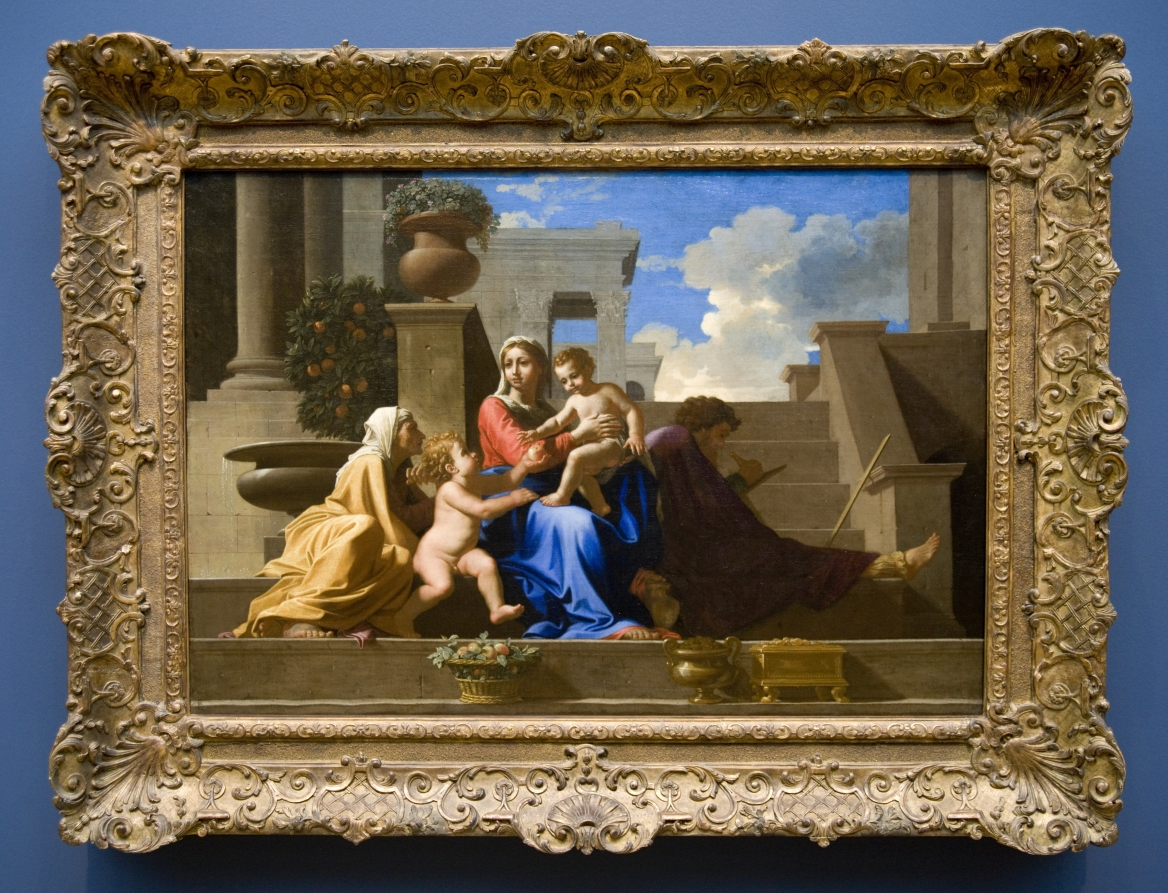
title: The Holy Family on the Steps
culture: France, 17th century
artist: Nicolas Poussin (French, 1594–1665)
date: 1648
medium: oil on canvas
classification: Painting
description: This deceptively simple composition represents a complex meditation on the Holy Family’s role in the redemption of humanity. At the center, Mary presents the Christ child to the world. At the left, Saint Elizabeth leans forward to foretell his eventual death, while her son, Saint John the Baptist, offers Jesus an apple, signifying humanity’s fall from grace in the Garden of Eden. At the right, Saint Joseph holds a compass, a sign of his occupation as a carpenter and also symbolic of God the Father. Poussin developed his composition meticulously and deliberately, using clear primary colors, simple forms, and a geometric organization to express the central importance of the Holy Family in Christian belief.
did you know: Poussin placed small wax models in a box pierced with holes to study lighting effects.